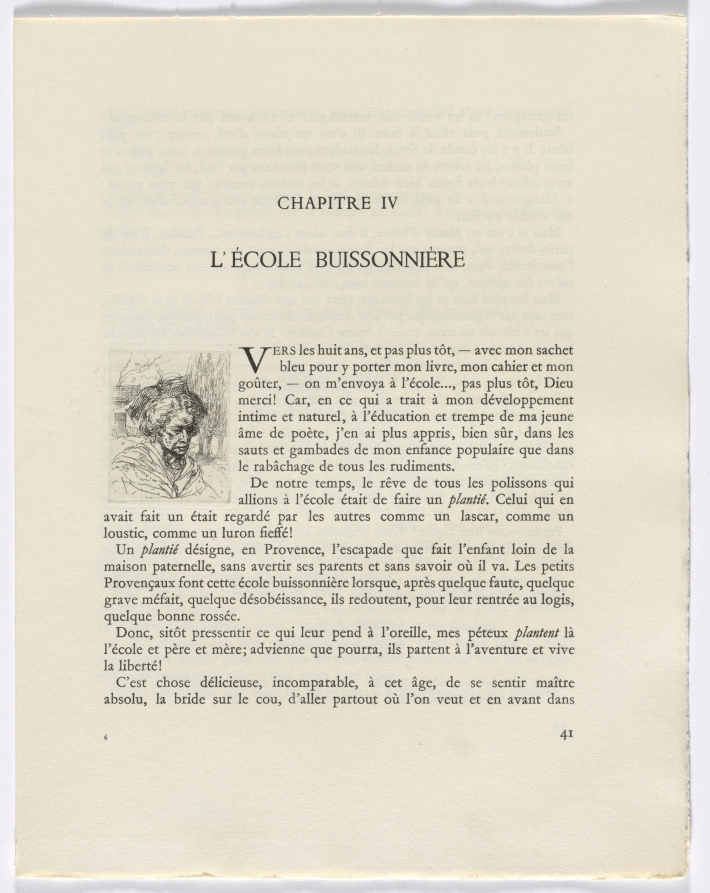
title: Frédéric Mistral: Mémoires et Recits by Frédéric Mistral: bust of a woman (page 41)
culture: France, 20th century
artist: Auguste Brouet (French, 1872–1941)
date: 1937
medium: etchings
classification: Portfolio